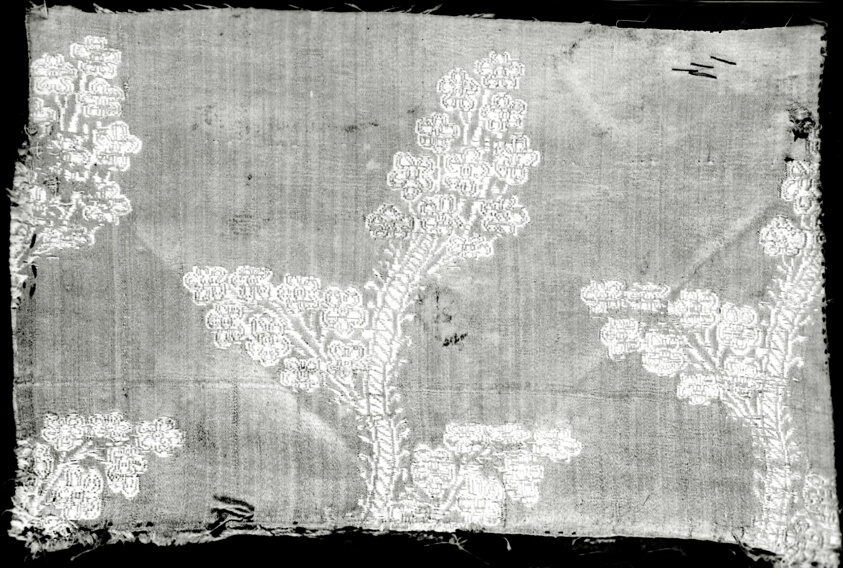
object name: Textile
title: Fragment (Dress Fabric)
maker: Iran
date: 18th century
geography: Iran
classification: textile; weaving